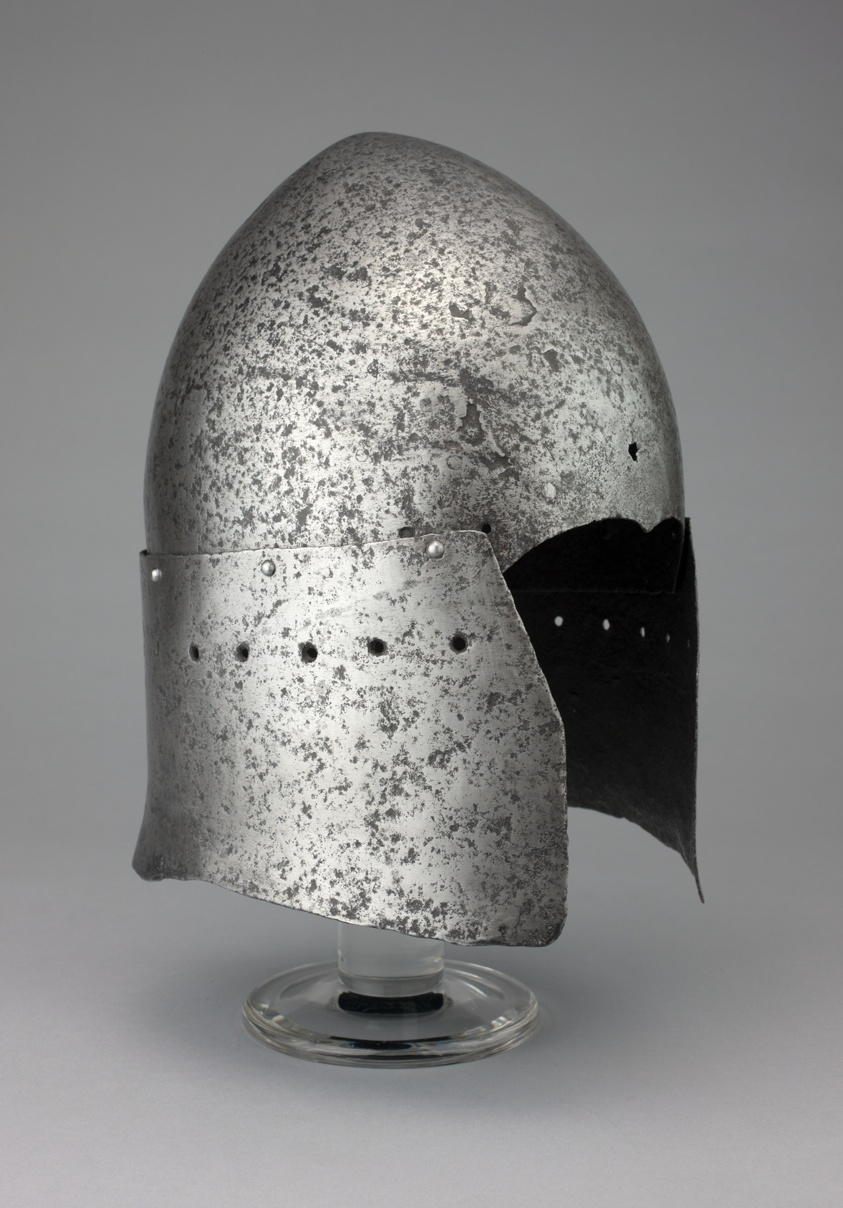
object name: Armor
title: Great Sallet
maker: Italian or Mediterranean in the Italian style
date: late 14th/early 15th century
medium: Steel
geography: Italy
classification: suit-helmet; armor; arms and armor